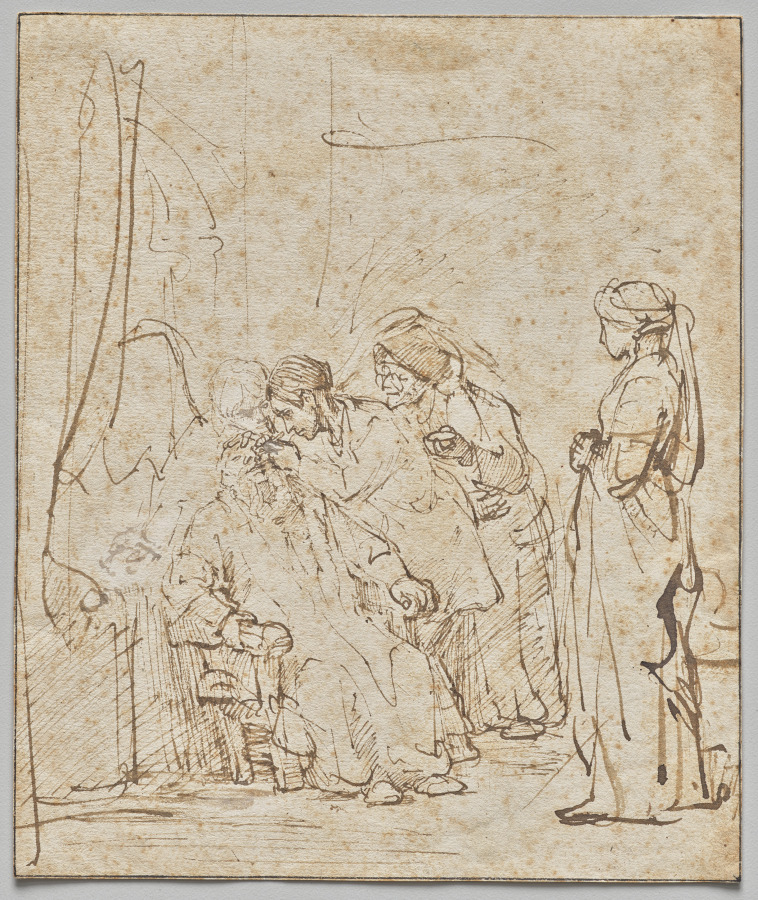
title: Tobias Healing His Father's Blindness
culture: Netherlands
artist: Rembrandt van Rijn (Dutch, 1606–1669)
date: c. 1640–45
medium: Pen and brown ink, touched with white gouache; framing lines in pen and brown ink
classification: Drawing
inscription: verso, upper center, in graphite: -13 [crossed out]; upper right, in black chalk: rembrant; upper right, in brown ink: D; upper center, in brown ink: [15-50?] / Tobias; upper left, in brown ink: 9 [sideways]; lower left, in brown ink: [illegible, cropped]; lower left, in brown ink: No 2910; lower left, in brown ink: Rembrandt; lower right, in brown ink: -d[l?]-13 [upside down]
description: This drawing is a prime example of the Dutch painter Rembrandt van Rijn's innovative approach to biblical narrative, in which he often humanized traditional pictorial formulas through the inclusion of observed details from everyday life. It depicts the climactic moment of the Book of Tobit, an apocryphal book of the Old Testament, in which, instructed by the archangel Raphael, Tobias heals his father Tobit's blindness by rubbing his eyes with fish gall. With spontaneity, a deft hand, and deceptive simplicity in his mark-making, Rembrandt depicts an intimate family scene including the archangel, Tobias, Hannah, and Sarah around a seated Tobit. Hannah’s spectacles, a unique detail among images of the scene created by Rembrandt and his circle, further thematizes sight. Rembrandt’s most innovative addition to the story centers on Tobias, who concentrates intensely to use a scalpel, rather than fish gall, to perform a cataract operation on his father’s left eye. Cataract surgery was a new procedure pioneered in Amsterdam in 1635 by Dr. Job Janszoon van Meekren, and Rembrandt may have witnessed the doctor perform it.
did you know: The seated figure in this drawing is receiving cataract surgery on his left eye, a procedure pioneered in Amsterdam in 1635 by Dr. Job Janszoon van Meekren.